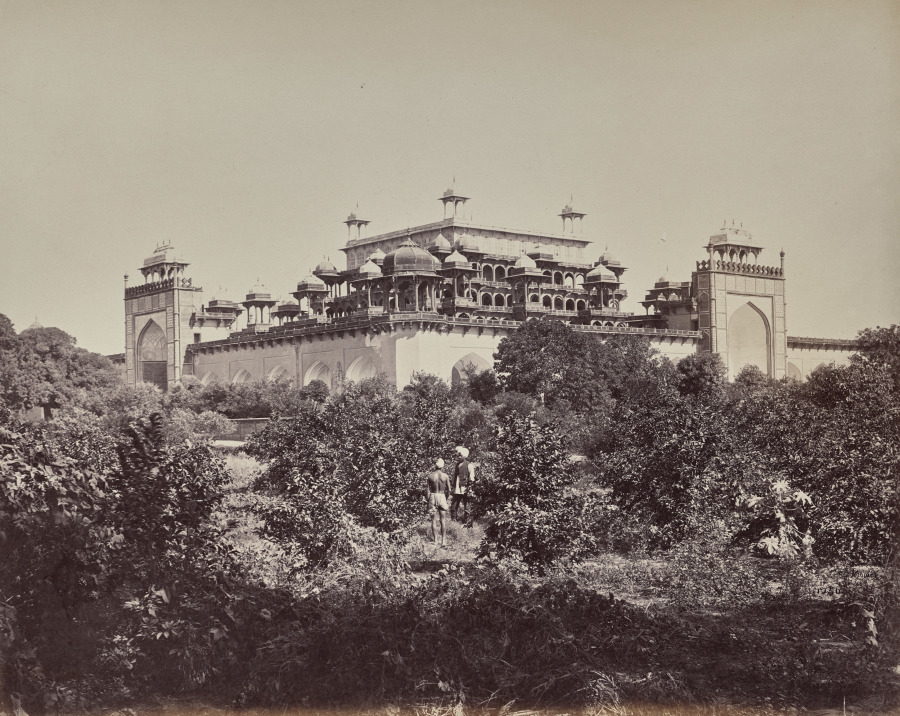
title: Secundra Near Agra. The Mausoleum of the Emperor Akbar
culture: England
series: Photographs of Northern India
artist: Samuel Bourne (British, 1834–1912)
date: 1863–70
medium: albumen print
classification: Photograph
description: The 50 images in this album, all taken in the 1860s, move from the hill towns of the Himalayas down to cities including Lahore (now in Pakistan), Delhi, Lucknow, Agra, Benares (now Varansi), and Calcutta (now Kolkata). Architectural studies of major monuments offer valuable historical records of what sites such as the Taj Mahal and the imperial mosque of the Mughal emperors in Delhi looked like before 20th-century restorations.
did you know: Samuel Bourne, the author of most the images in this album, was a banker in England before he moved to India to become a professional photographer.